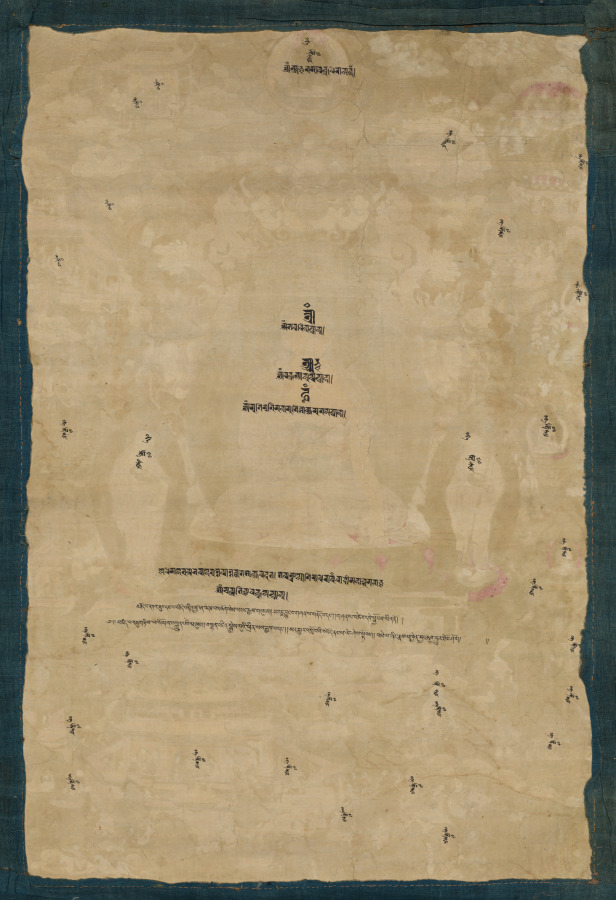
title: Shakyamuni Buddha with scenes from his life story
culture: Tibet, Qing dynasty (1644–1911)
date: c. 1700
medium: gum tempera on cloth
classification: Painting